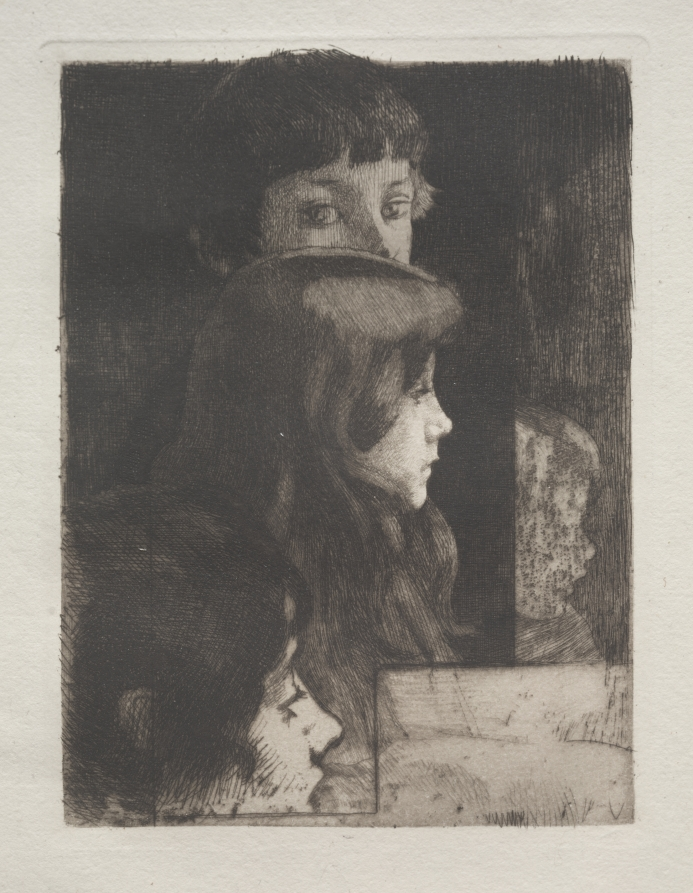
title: Study of Heads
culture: France, 19th-20th Century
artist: Albert Besnard (French, 1849–1934)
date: 1899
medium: etching and aquatint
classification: Print